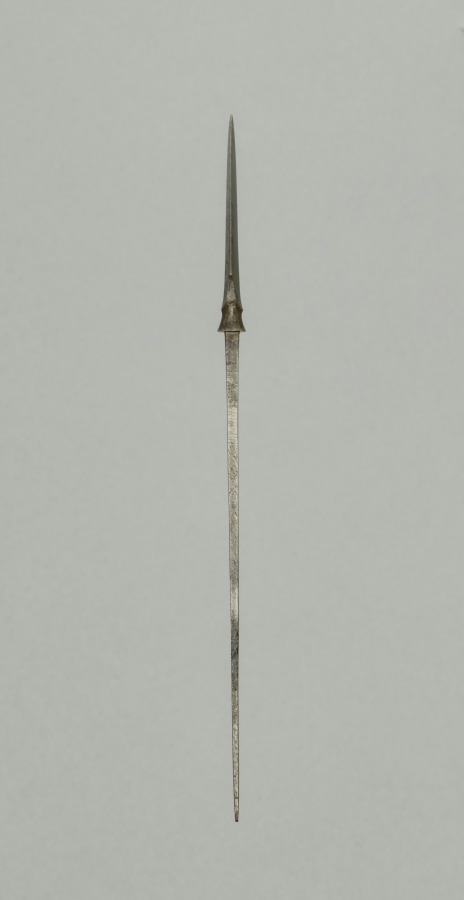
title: Arrow Point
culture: Japan, Edo period (1615–1868)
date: 1700s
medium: steel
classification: Arms and Armor